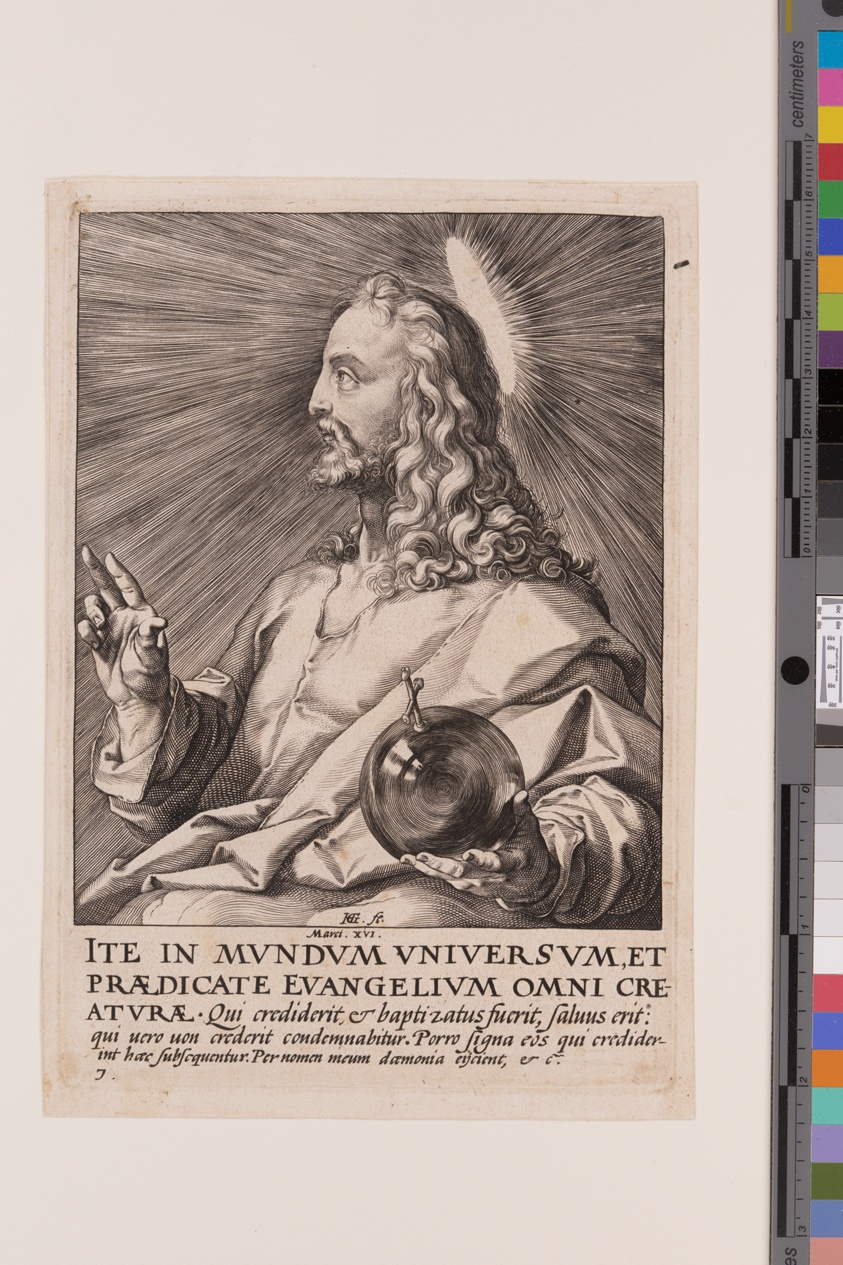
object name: Print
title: Christ, from Christ, the Apostles and St Paul with the Creed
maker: Hendrick Goltzius (Dutch, 1558–1617)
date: 1589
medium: Engraving on ivory laid paper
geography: Netherlands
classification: engraving; paper; print; prints and drawing